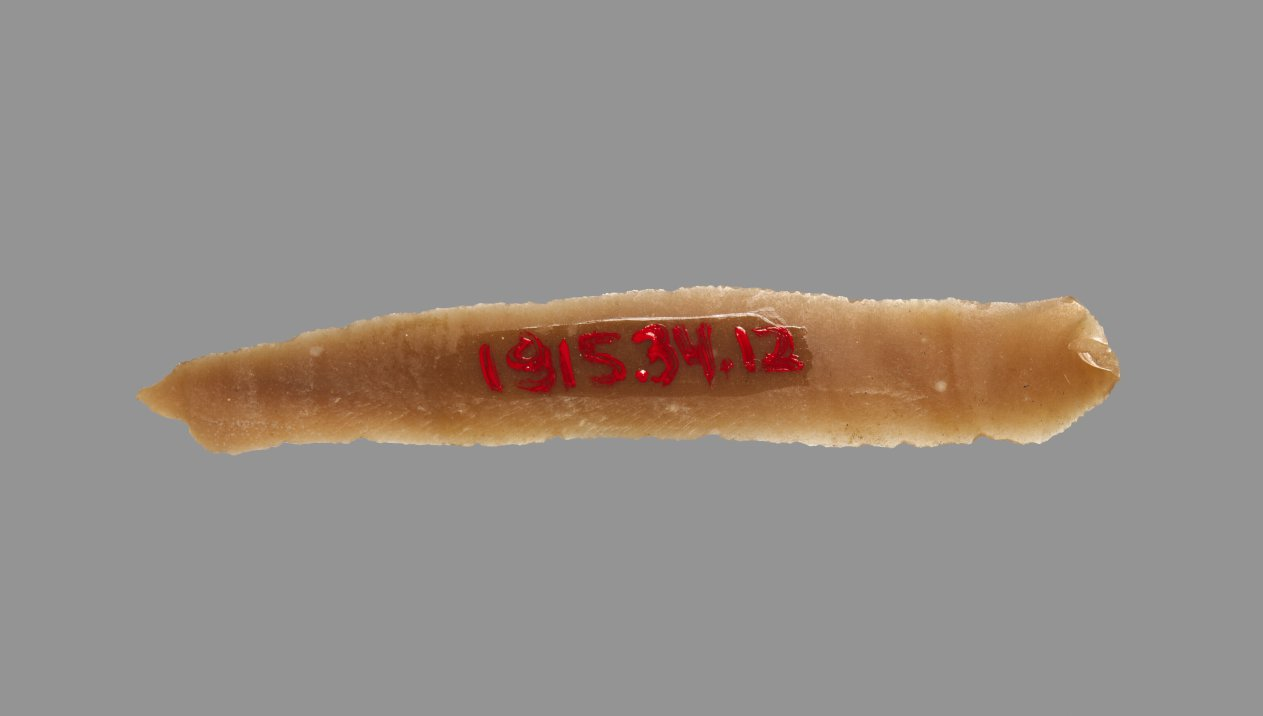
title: Sickle Blade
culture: Egypt, Middle Kingdom (2040–1648 BCE), Dynasty 12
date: 1980–1801 BCE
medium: flint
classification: Implements